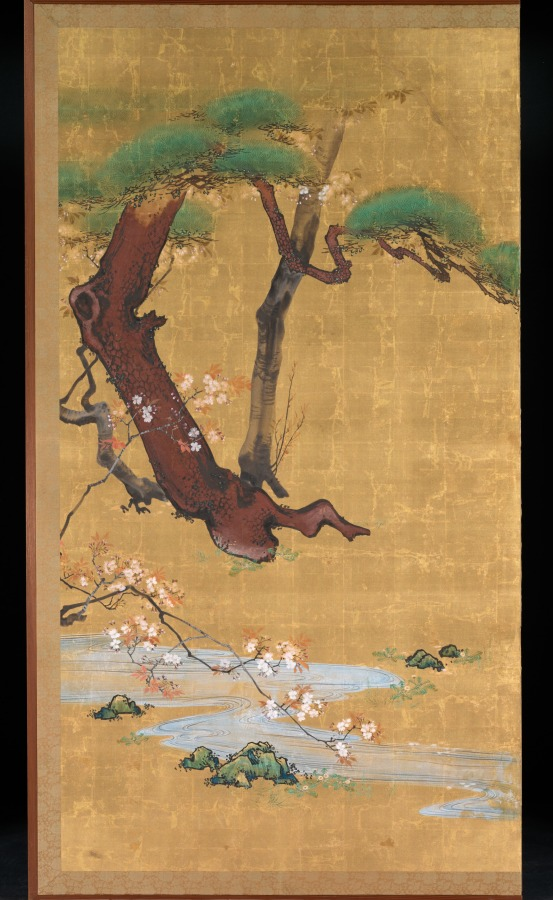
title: Nagisa Palace from the Tales of Ise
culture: Japan, Edo period (1615–1868)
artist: Shibata Zeshin (Japanese, 1807–1891)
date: late 1800s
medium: Two-panel folding screen; ink, color, lacquer, and gold on silk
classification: Painting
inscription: signed: Tairyuko Zeshin sei; sealed: Furumitsu.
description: This screen depicts an episode from the Tales of Ise, a 10th-century collection of poems and associated narratives in which the main character composes the following poem while drinking sake and viewing cherry blossoms: If, in this world of ours / All the cherry blossoms / Disappeared / The heart of spring / Might find peace. Our hero relaxes on a shoulder rest, gazing at the flowers, his sake dish before him on a lacquered stand. A plump boy attendant monitors the sake dishes, a ewer at the ready. An associate sits with paper, ink, and brush, poised to record poems.